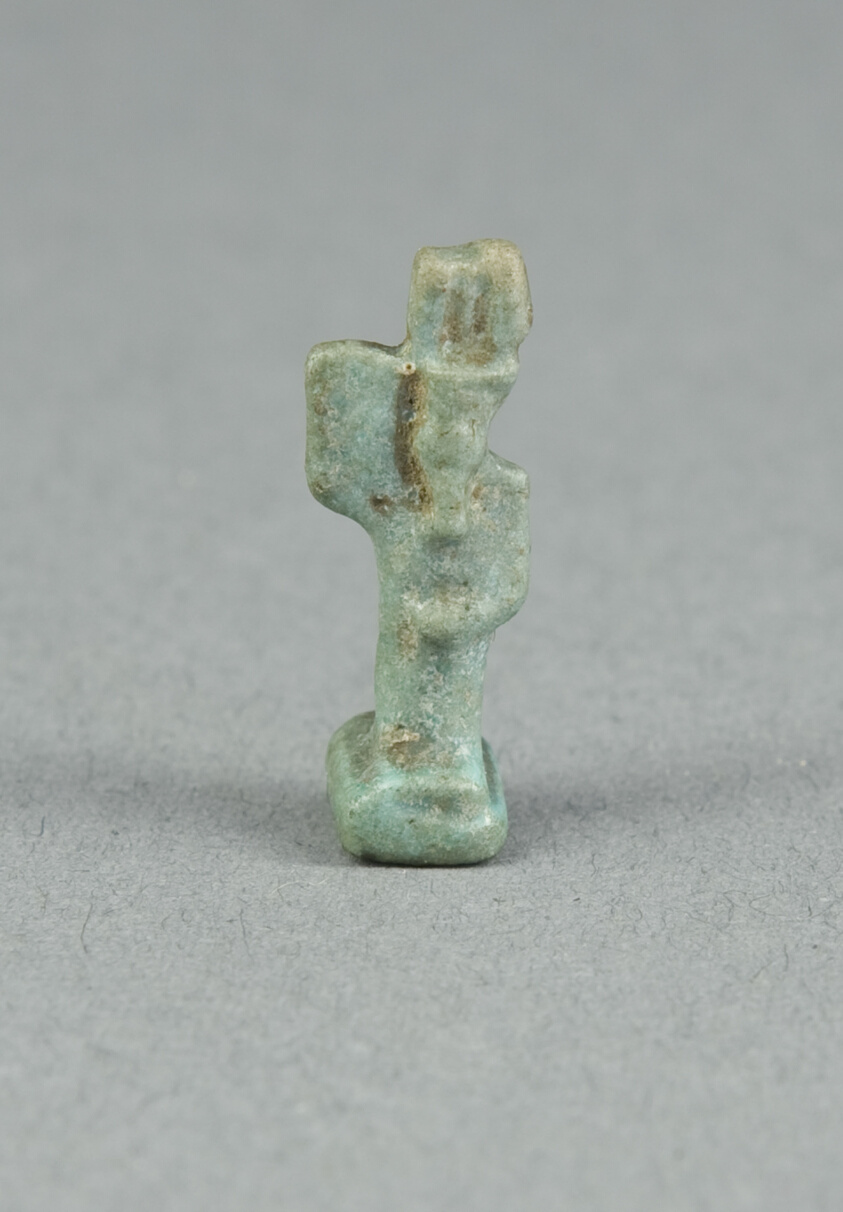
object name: Costume and Accessories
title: Amulet of the God Min or Amun-Min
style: egyptian, ancient, late period (egyptian), third intermediate period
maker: Egyptian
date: Third Intermediate–Late Period (about 1070–332 BCE)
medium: Faience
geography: Egypt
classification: amulet; jewelry; ancient art; costume; faïence (composite material)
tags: gods (deities), deities